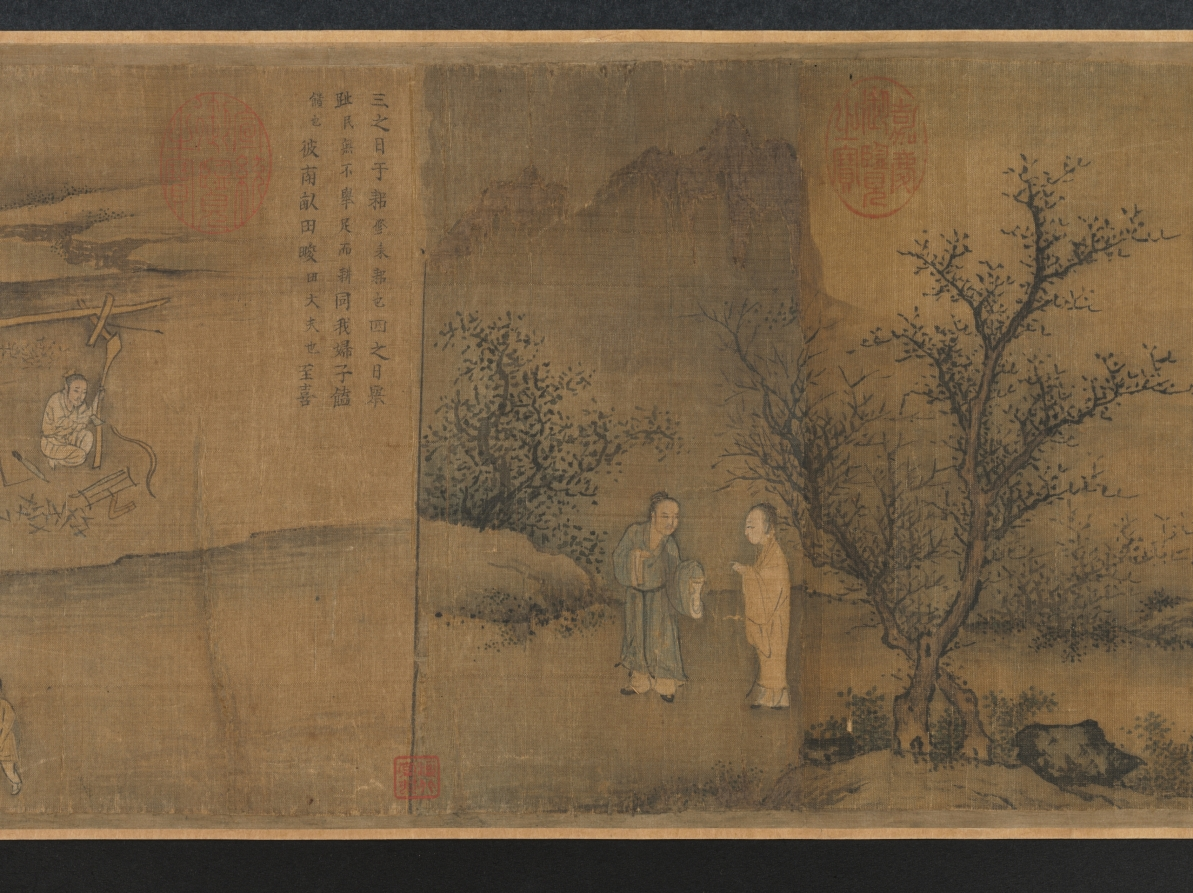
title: "Seventh Month" from the Odes of Bin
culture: China, Southern Song dynasty (1127-1279)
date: 1200s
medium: Handscroll; ink and color on silk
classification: Painting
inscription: Colophons: 1. [on the frontispiece] by the Qianlong emperor (dated 1741). 2. by Lu Wan (dated Zhengde dingchou, 1517). 2. by the Jiaqing emperor (dated 1807).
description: According to Confucian thought, the ruler looks after the well-being of his people which involves agricultural activities. Seventh Month from the ancient Odes of Bin in the Shijing (Book of Poetry) describes occupations throughout the year, including plowing, harvesting, hunting, making clothes, and observing rituals. The earliest illustrations of these Odes accompanied by text were commissioned by Southern Song emperor Gaozong (reigned 1127–1162). As the lower Yangzi delta had become the new seat of government, Gaozong had sets of these illustrations produced by court artists to revive the dynasty and convince the Confucian officialelite of his legitimacy to rule.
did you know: The Odes of Bin appears in the classic Shijing (Book of Poetry), an anthology of more than 300 poems, folk songs, and ceremonial hymns that were originally chanted to music.